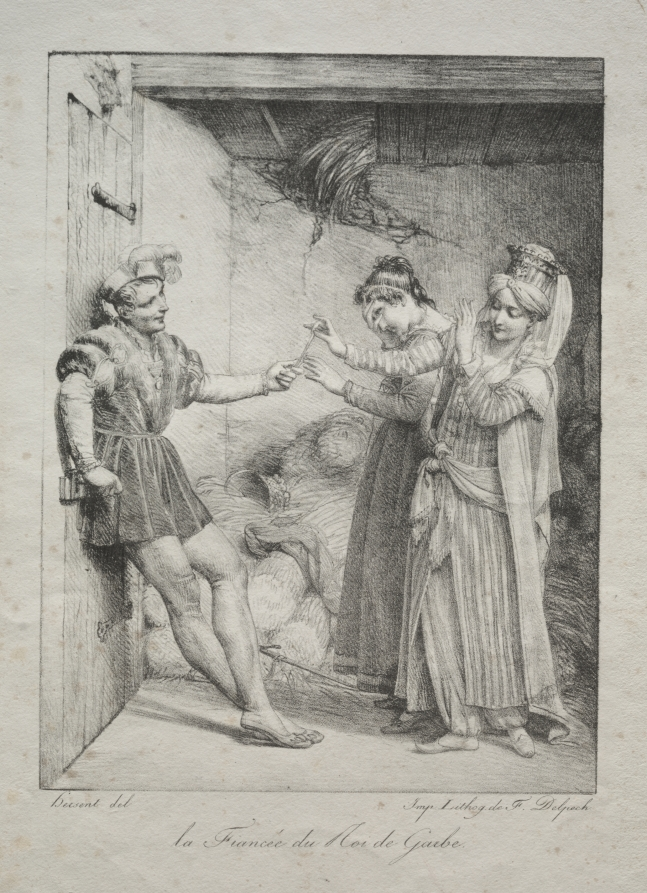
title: The Fiancée of the King of Garbe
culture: France, 19th century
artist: Louis Hersent (French, 1777–1860)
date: 1800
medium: lithograph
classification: Print